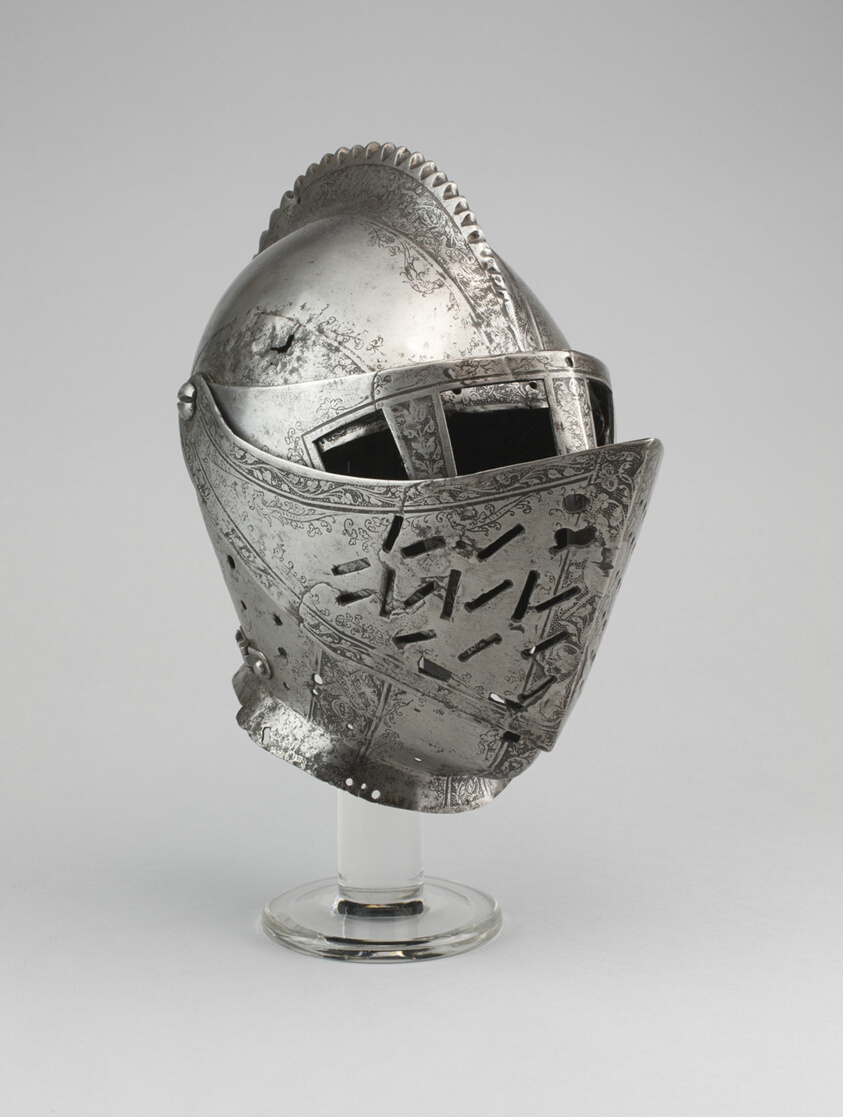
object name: Armor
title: Close Helmet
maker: Possibly by the workshop of Wolfgang Grosschede; Southern German, Landshut, active 1551–1562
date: 1551, possibly 1557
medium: Steel with gilding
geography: Landshut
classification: suit-helmet; armor; arms and armor